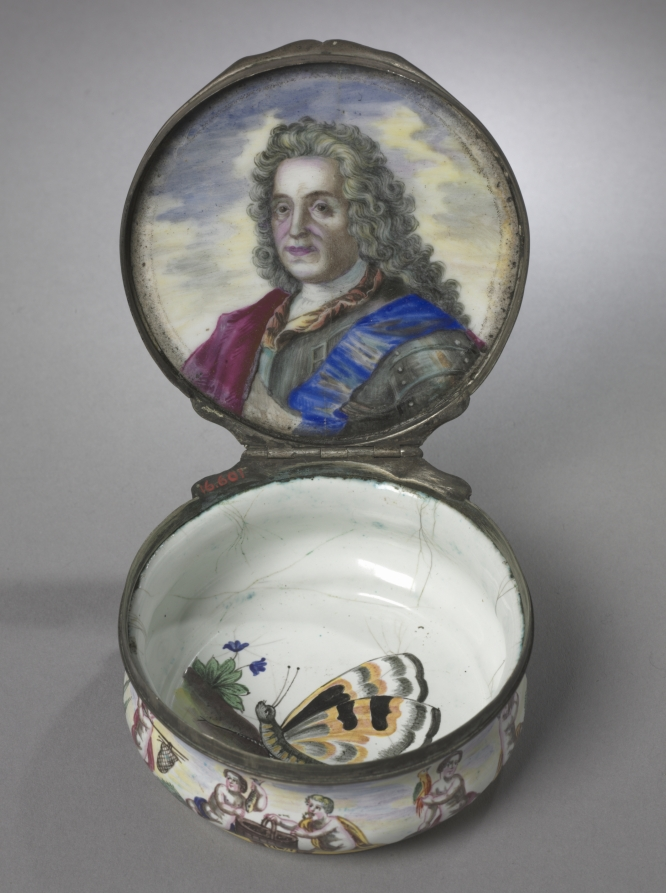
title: Box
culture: Italy or Germany, 18th century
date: 1700s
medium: enamel on copper, metal mounts with traces of gilding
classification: Miscellaneous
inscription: inside box appear the letters "FB" in monogram.